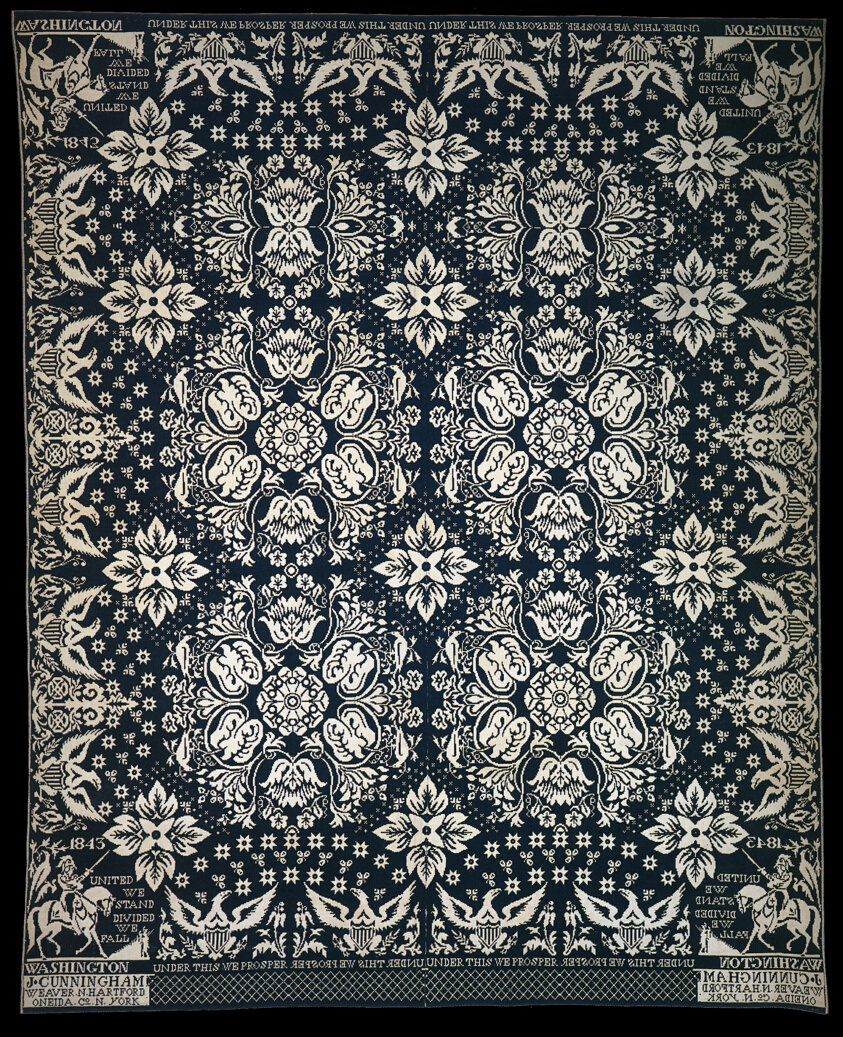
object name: Textile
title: Coverlet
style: 19th century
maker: James Cunningham (American, born Scottish, c. 1797-after 1865); United States, New York, Oneida County, New Hartford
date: 1843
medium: Cotton and wool, plain weave double cloth; woven on loom with Jacquard attachment; two loom widths joined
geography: New York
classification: weaving - coverlet; coverlet; textile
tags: floral motifs, patriotism, medallions, shields, eagles, horseback riding, horsemen, horses, washington, coverlet